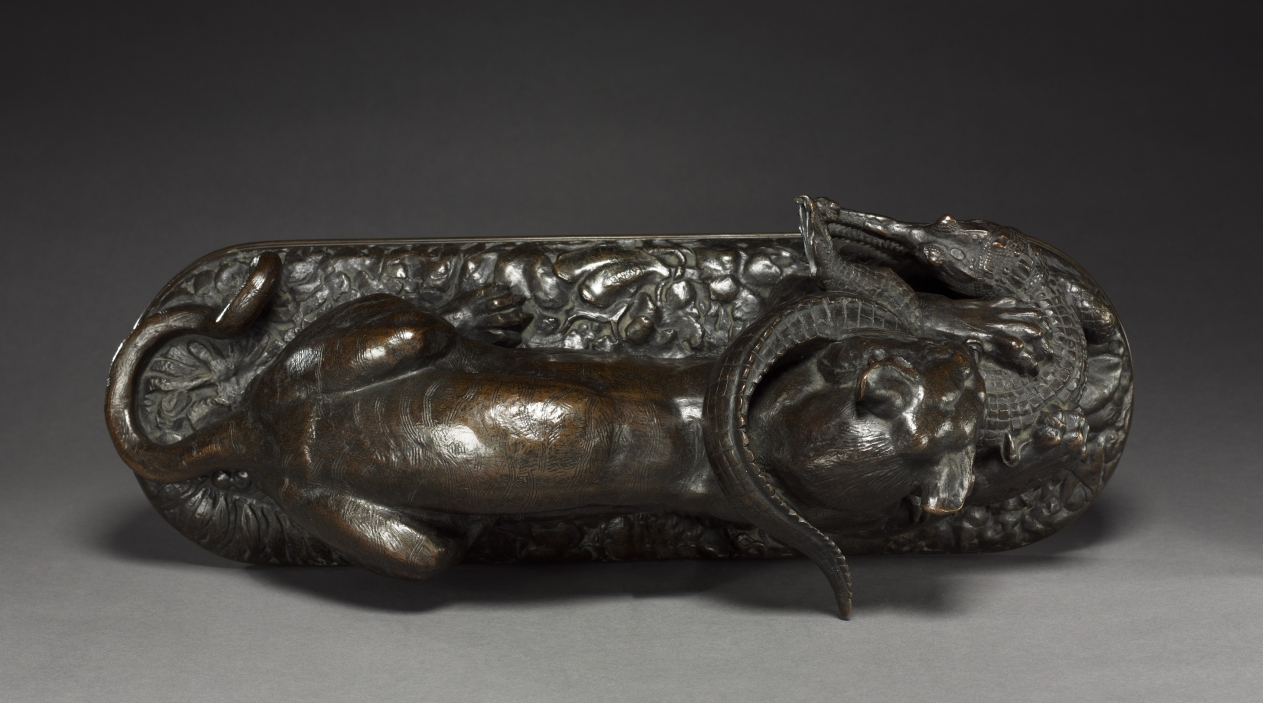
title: Tiger Devouring a Gavial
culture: France, 19th century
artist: Antoine-Louis Barye (French, 1796–1875)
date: 1831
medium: bronze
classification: Sculpture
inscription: Signed: "BARYE"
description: A large reptile of southern Asia, the gavial is related to and resembles a crocodile.